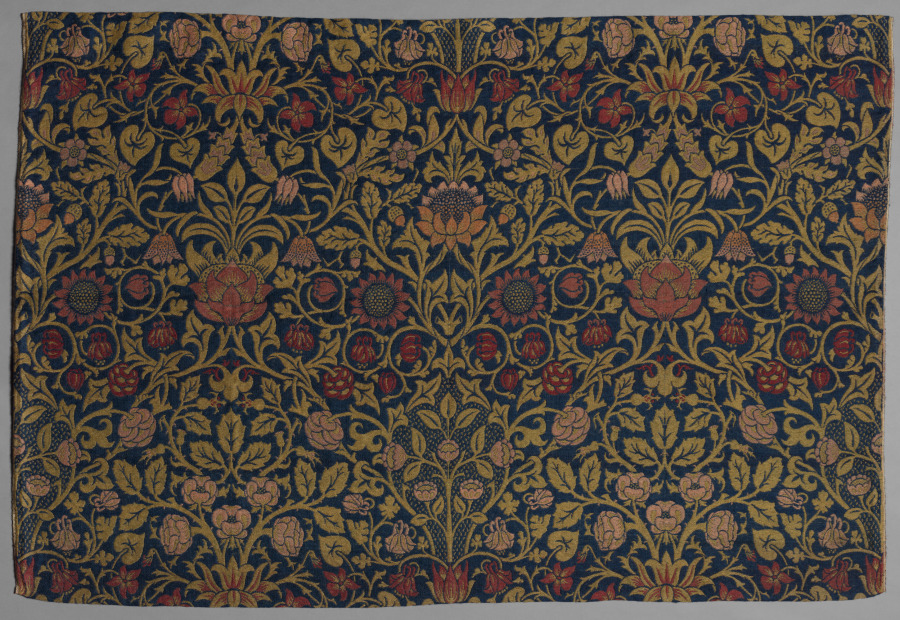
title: Violet and Columbine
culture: England, Surrey, Merton Abbey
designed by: William Morris (British, 1834–1896)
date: 1883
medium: jacquard loom woven weft-faced twill, double cloth; wool and mohair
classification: Textile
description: Morris envisioned textiles such as Violet and Columbine hanging in heavy folds, the rich colors and flowing pattern suggesting a garden wall. He strongly preferred experimenting with natural dyes instead of using the garish chemical ones that had become standard in industrialized England. Even though organic dyes were expensive and scarce, and required dyers to revive old methods, they were less likely to fade in the light or during washing, and they were capable of producing more subtle tonal effects. A sense of the process of hand-weaving can be understood by looking at the back of this textile. The warp (up and down) threads are light blue and green—visible at the bottom. The textile was woven in long lengths that could be cut at these passages of loose thread. The weft (side to side) threads in several colors, including red, pink, yellow, and blue, are more visible from the back than the front, where they disappear into the pattern.